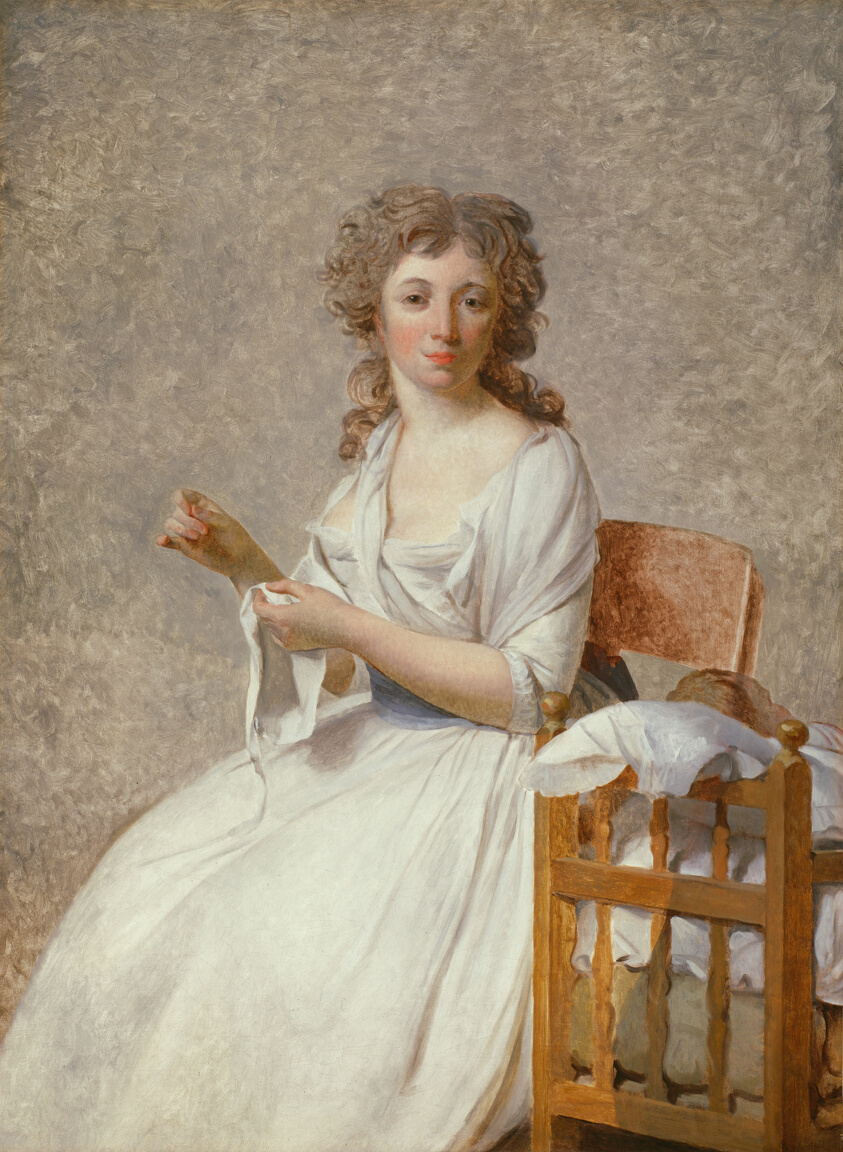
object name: Painting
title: Madame de Pastoret and Her Son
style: 18th Century, Neoclassicism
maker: Jacques-Louis David (French, 1748–1825)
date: 1791–92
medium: Oil on canvas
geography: France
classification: oil on canvas; france; french; oil paintings (visual works); paint; portrait; painting; european painting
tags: portraits, woman with children, portrait, portraits: European subject, portraits: French subject, portraits: female subject, interiors, dresses, white (color), domestic scenes, sewing, mothers, children, women